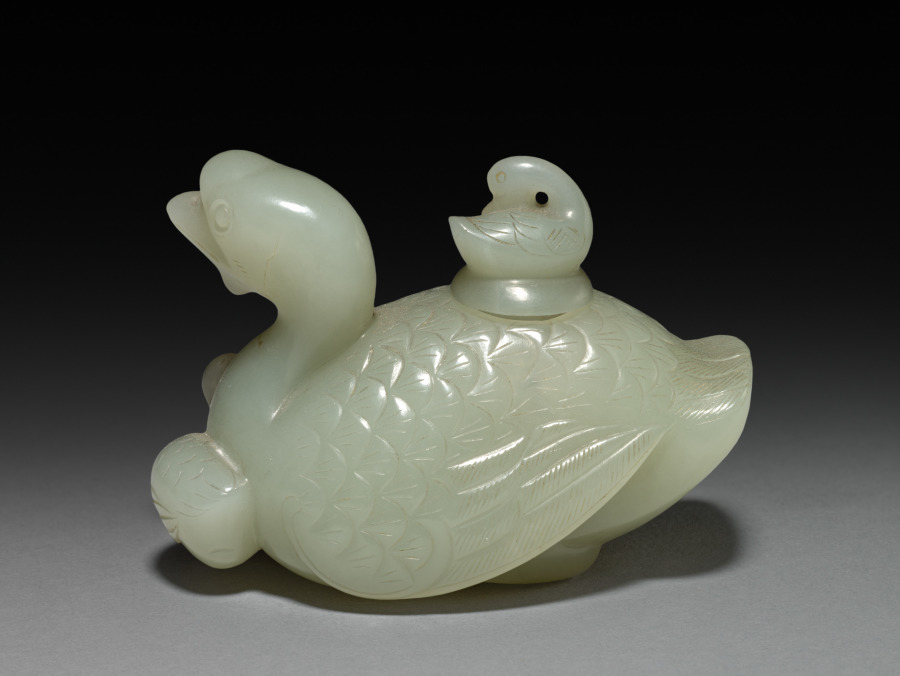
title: Goose and Goslings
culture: China, Qing dynasty (1644-1911)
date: 1700s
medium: jade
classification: Jade